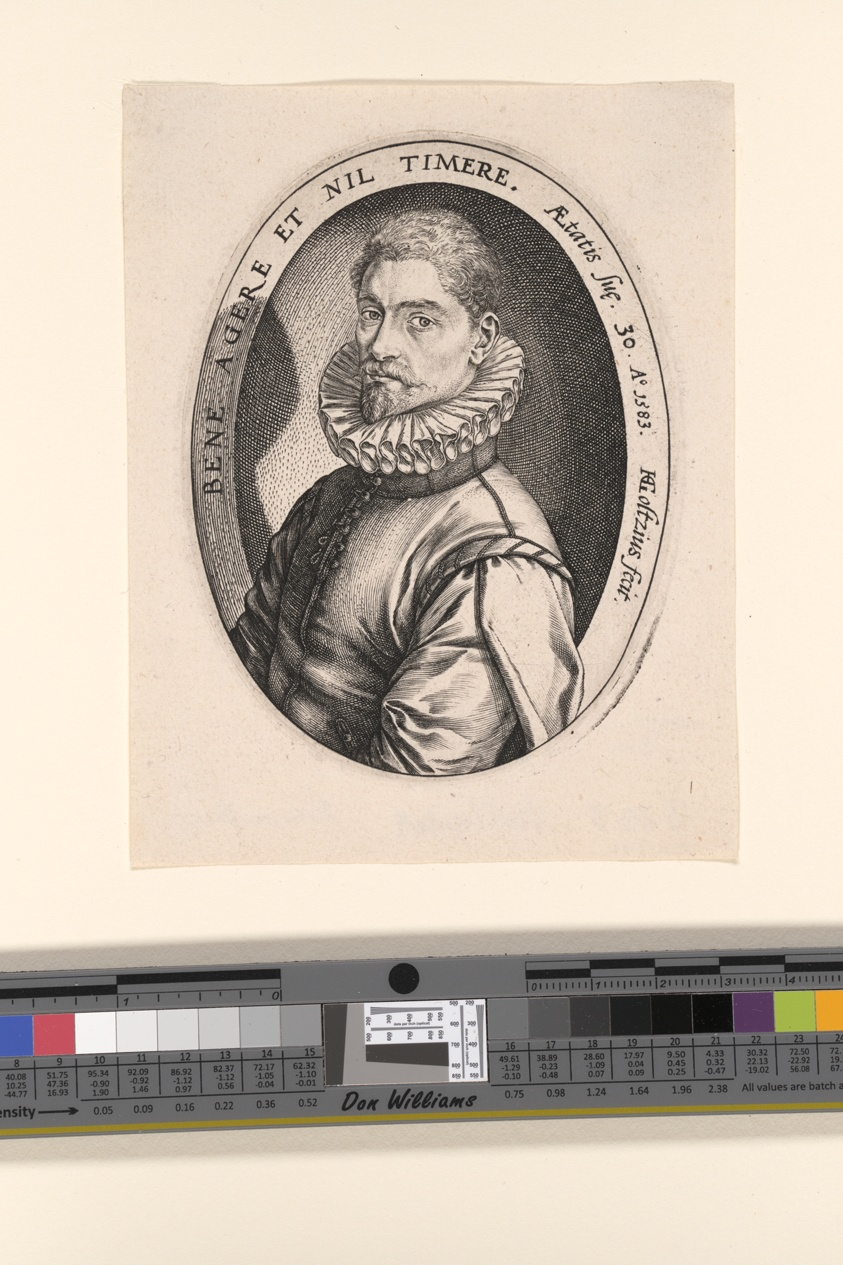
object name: Print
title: Hieronymous Scholiers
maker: Hendrick Goltzius (Dutch, 1558–1617)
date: 1583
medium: Engraving on paper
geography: Netherlands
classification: engraving; paper; print; prints and drawing